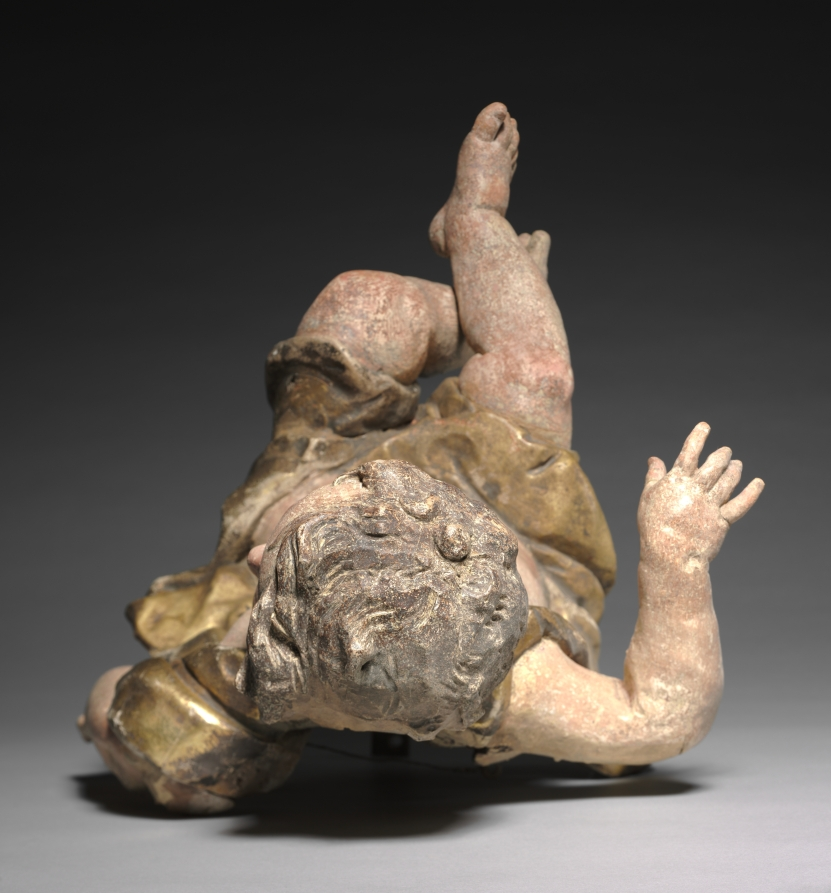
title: Putto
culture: Germany, near Bamberg, 18th century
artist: Ferdinand Tietz (Austrian, 1708–1777)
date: mid-1700s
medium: painted and gilded wood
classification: Sculpture